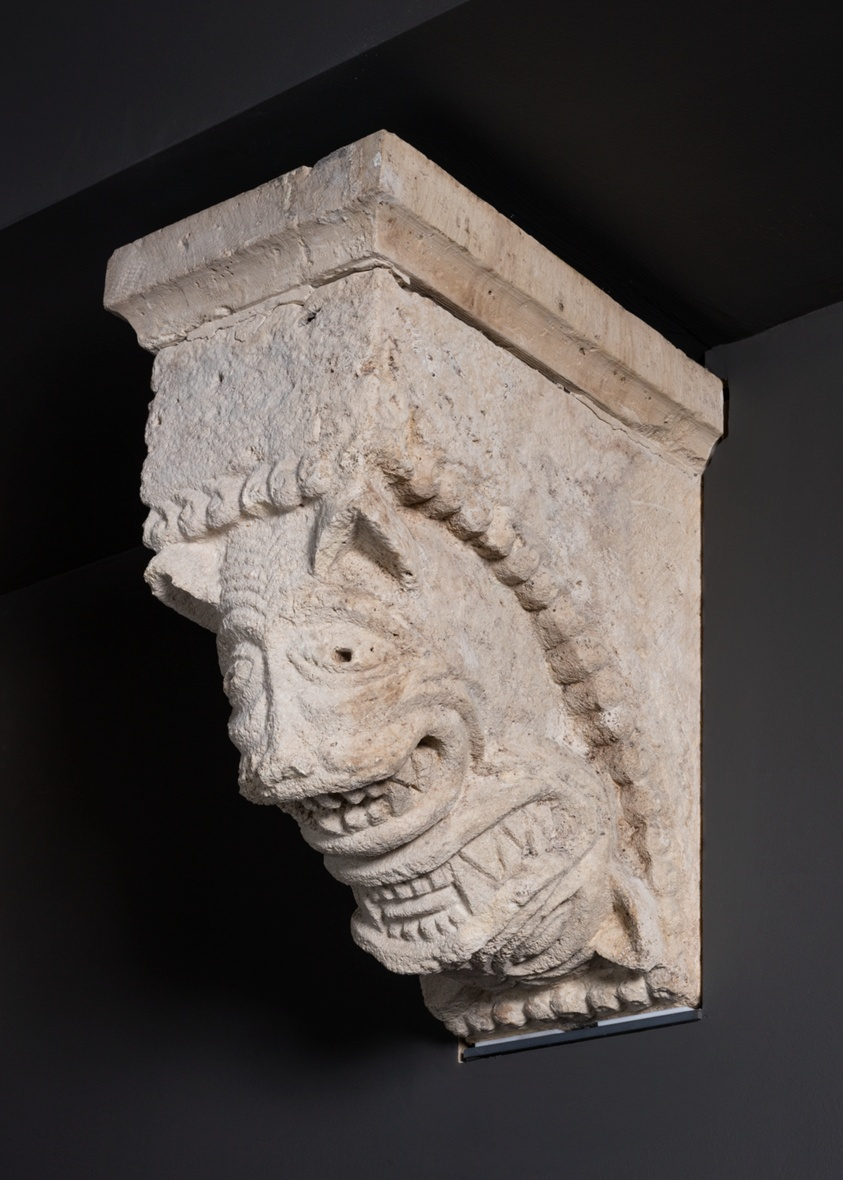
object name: Sculpture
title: Corbel with Two Animal Masks from the Monastery Church of Notre-Dame-de-la-Grande-Sauve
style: medieval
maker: French; Aquitaine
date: 1150/1200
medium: Limestone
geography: France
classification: sculpture; architectural detail; architectural fragment; architecture; fragment; france; french; limestone; sculpture/stone; stone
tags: corbel, animals, architechture, architectural, architectural detail, architectural fragment, architectural fragments, architecture, architecture, masks